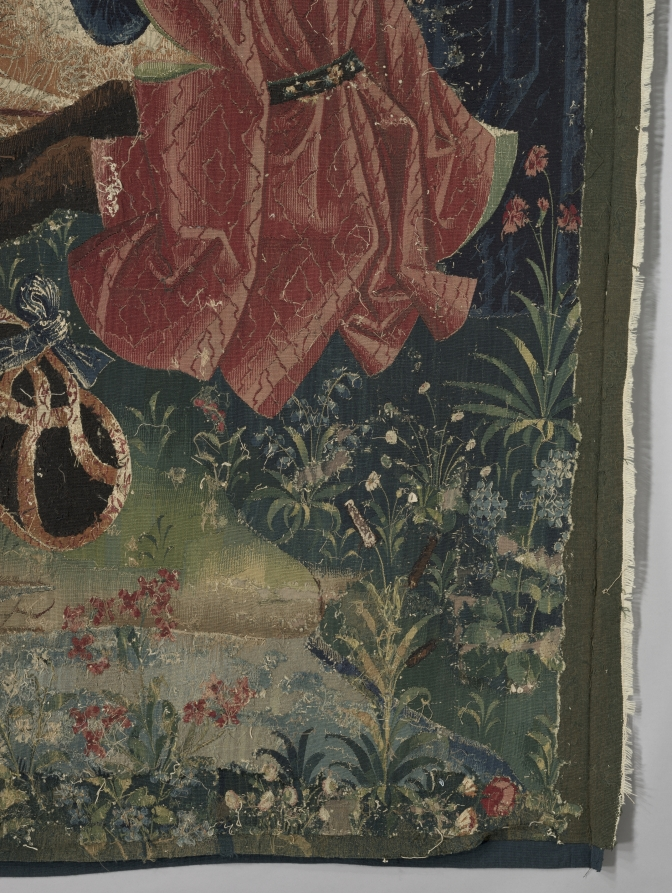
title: Time (from Chateau de Chaumont set)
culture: France, Lyon(?), early 16th century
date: 1512–15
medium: silk and wool; tapestry weave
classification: Tapestry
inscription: French verse in Gothic letters translates as follows: "One sees the weather adorned in green, Sometimes as pleasing as an angel; To suddenly change and be quite strange, The weather never stays the same."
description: Pierre Sala, who likely commissioned the set, is portrayed as the richly attired central figure offering a bouquet, a symbol of knowledge, to Éléonore, his daughter. Éléonore is pregnant, revealed by her upturned skirt and the persimmon in her husband Hector’s hand. Hector’s mother, Marguerite, in dark attire, will wed the widowed Sala in 1519. They appear in front of the royal chateau of Blois. The figures at the right convey Sala’s advice to his children. Time (the old man with the staff) with Clio, the Muse of History, standing on his shoulders, is being attacked by a Herculean youth wielding a stick. With this allegory, Sala is explaining that youth is ignorant of the complexities of life and time. The small unicorn at the far right represents the soul. The verse in Old French at the top refers to changing time: One sees Time adorned with green foliage, Sometimes as pleasant as an angel, Then suddenly change and become quite strange. Never does Time persist in one state.